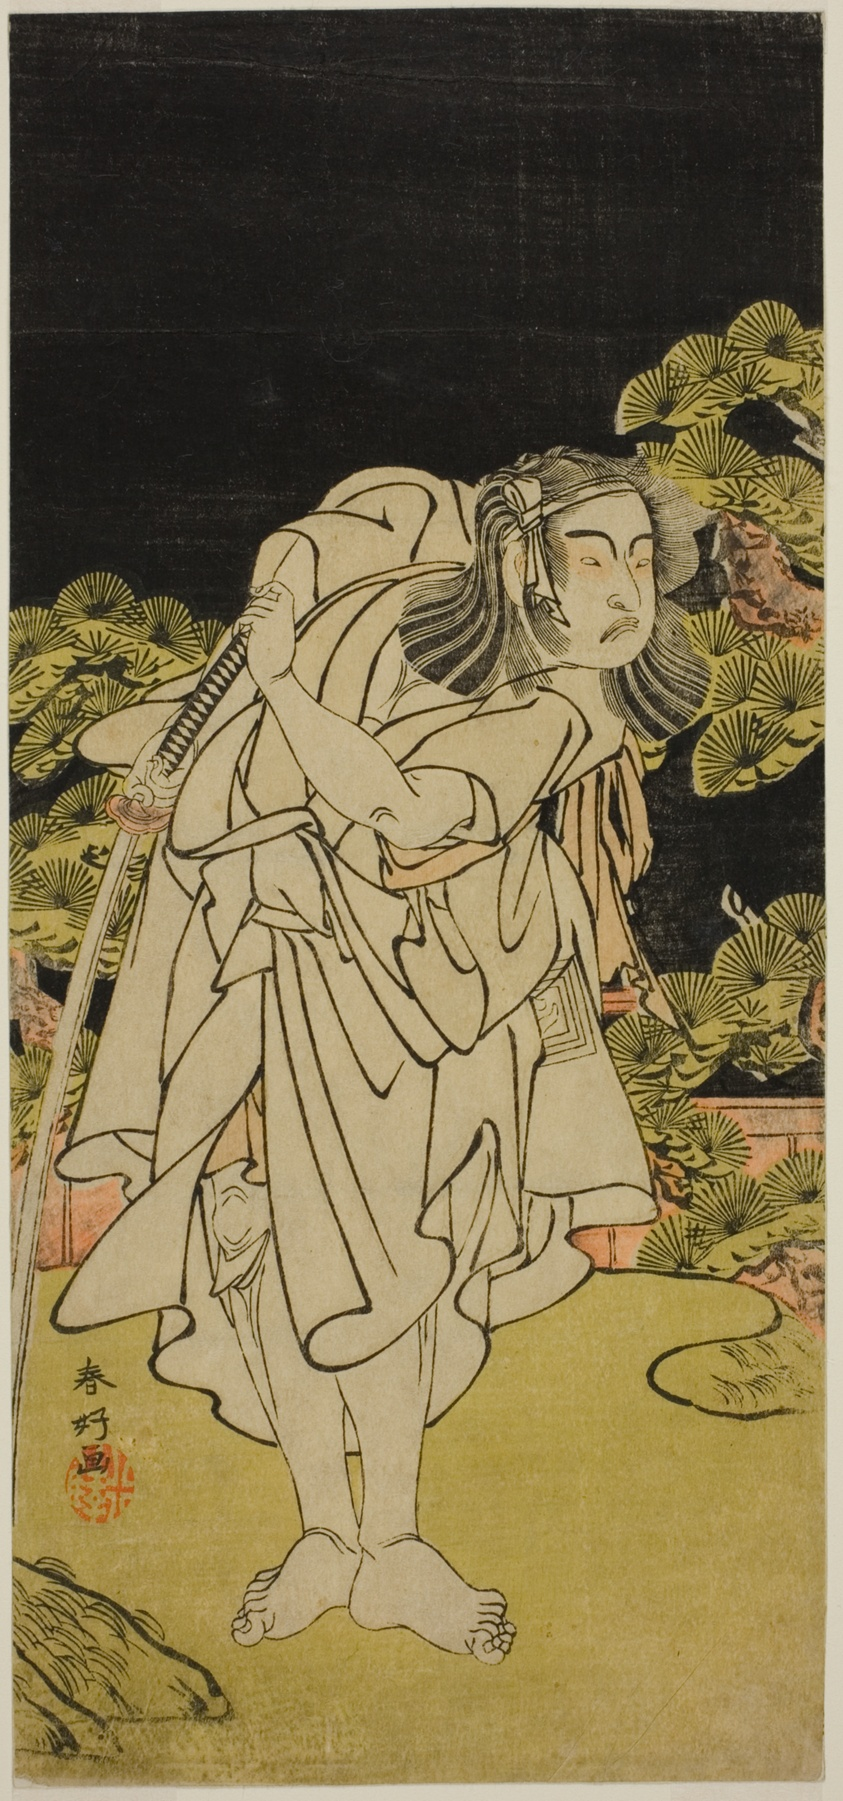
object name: Print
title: The Actor Ichikawa Yaozo II as Soga no Dozaburo (?) in the Play Kamuri Kotoba Soga no Yukari (?), Performed at the Ichimura Theater (?) in the First Month, 1776 (?)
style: Japanese (culture or style)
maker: Katsukawa Shunko I; Japanese, 1743-1812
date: c. 1776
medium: Color woodblock print; hosoban; left sheet of diptych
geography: Japan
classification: woodblock print; print; asian art